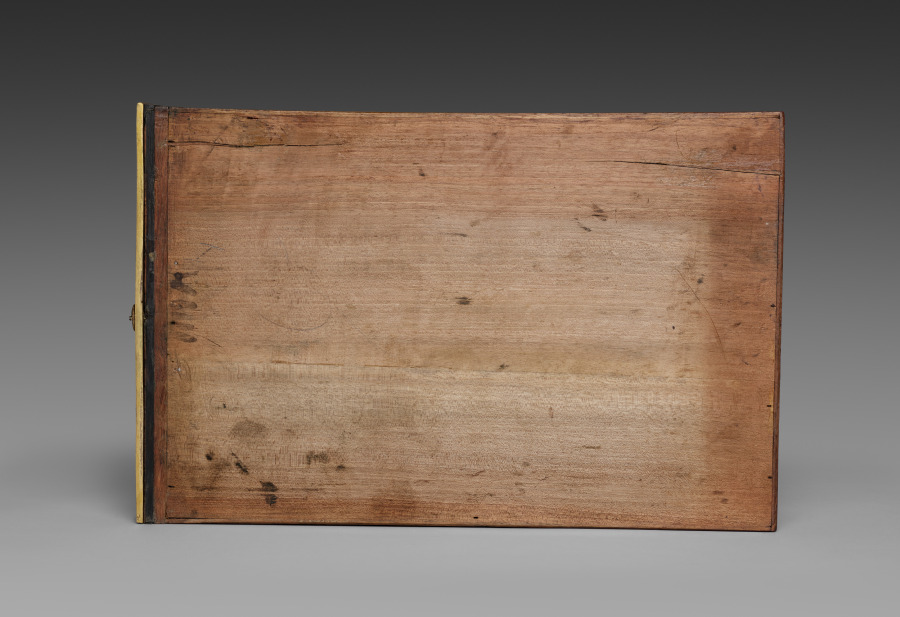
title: Side Drawer for Cabinet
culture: France, late 17th Century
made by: André-Charles Boulle (French, 1642–1732)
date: c. 1690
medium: ebony, marquetry in metal and tortoise shell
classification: Furniture and woodwork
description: Appointed cabinetmaker to King Louis XIV in 1672, André-Charles Boulle became a master of furniture making in France during the late 1600s until his death in 1732. Known primarily for his use of marquetry, in which metal patterns are inlaid into tortoiseshell then applied within the veneered surface of the furniture, Boulle established a level of quality and craftsmanship few others could achieve. As a result, his work found favor at the royal court and among other aristocrats and diplomats eager to impress the king. The inclusion of a medallion depicting Louis XIV within the bronze decoration of this chest would have identified the owner with the royal court. Often exhibiting stout architectural proportions with elegant groups of inlaid motifs such as the parrot on the central panel of this chest, Boulle’s designs are an example of the intellectual fashion for contrasting ideas, materials, and motifs.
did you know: Originally designed to sit atop an elaborate tall stand, this chest was likely altered in the late 1700s to reduce its scale and height.